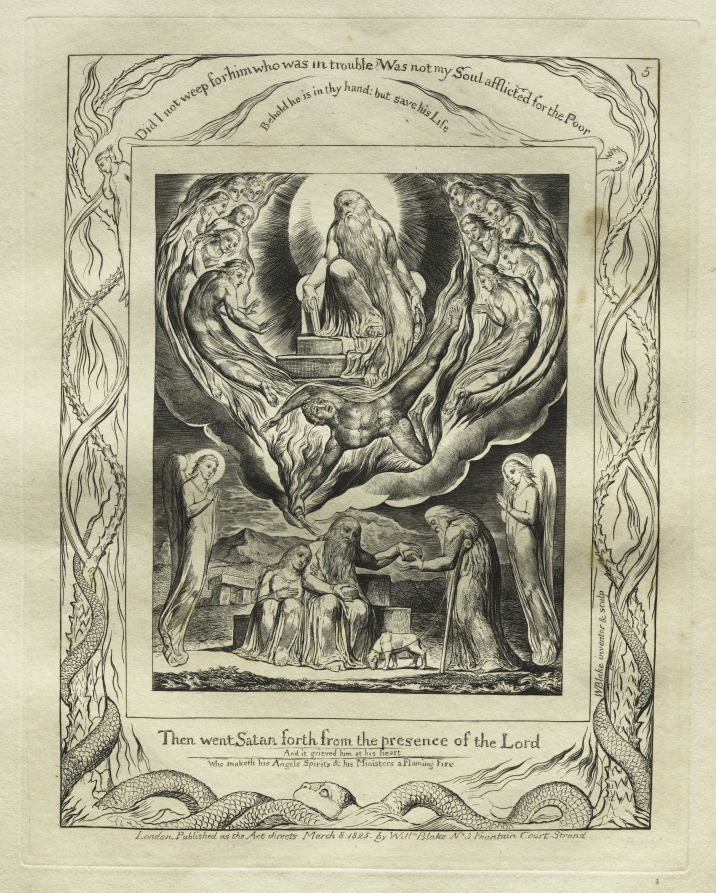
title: The Book of Job: Pl. 5, Then went Satan forth from the presence of the Lord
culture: England, 19th century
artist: William Blake (British, 1757–1827)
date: 1825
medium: engraving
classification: Print